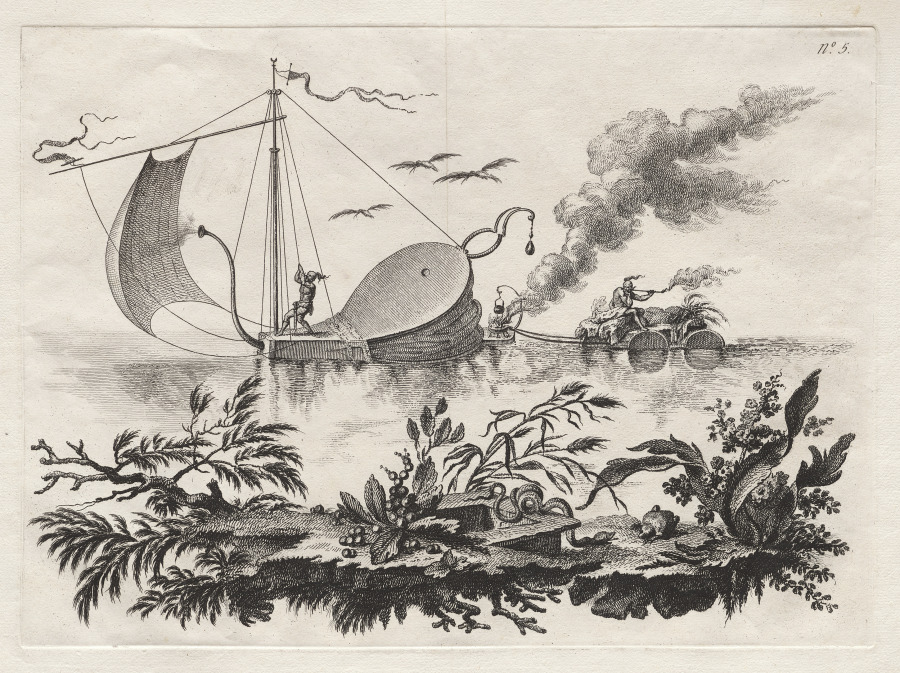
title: The Manner of Transporting Wares on Barges Drawn by a Bellows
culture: Italy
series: Suite of the Most Notable Things Seen by John Wilkins Erudite English Bishop during His Famous Voyage from the Earth to the Moon … dedicated to Sir William Hamilton ambassador to the Court of Naples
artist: Filippo Morghen (Italian, 1730–after 1807)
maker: possibly after Jean-Pierre-Louis-Laurent Hoüel (French, 1735–1813)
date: about 1769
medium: etching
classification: Print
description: Filippo Morghen’s set of 10 etchings is outstanding among visual narratives of imaginary voyages to the moon, both visual and literary, that intrigued 18th-century European audiences. A title page and nine plates depict the imagined lives and economy of moon dwellers. These include modes of transport such as large birds and sailboats propelled by giant bellows, enormous scissors for capturing wild beasts (including an oversized rat), and the use of giant pumpkins as fishing boats and as dwellings. Representations of the moon dwellers are based on inaccurate and imaginary European interpretations of Asian, Ottoman, and Native American cultures—called chinoiserie and turquerie—that permeated the decorative and visual arts of the period.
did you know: Morghen based this print series on three books dedicated to moon exploration, including Bishop Francis Godwin’s The Man in the Moone (1640).